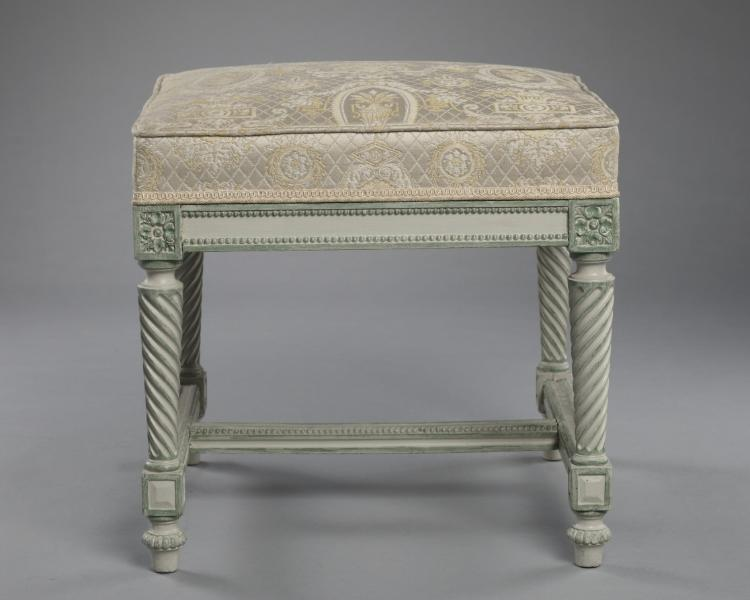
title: Stool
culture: France, Paris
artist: François-Honoré-Georges Jacob (French, 1770–1841)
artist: Georges Jacob (French, 1739–1814)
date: 1805–1813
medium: painted walnut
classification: Furniture and woodwork